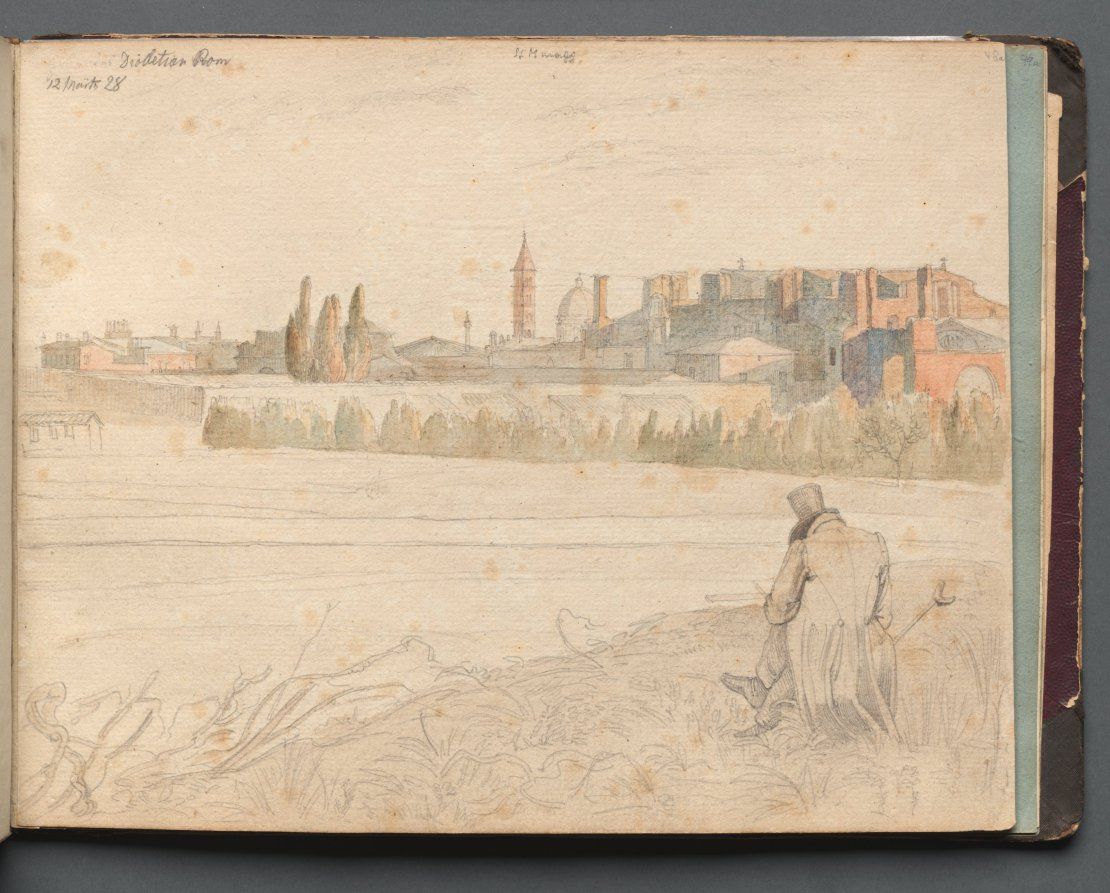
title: Album with Views of Rome and Surroundings, Landscape Studies, page 48a: Roman Panoramic View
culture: Germany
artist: Franz Johann Heinrich Nadorp (German, 1794–1876)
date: c. 1830s-70s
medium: watercolor with graphite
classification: Bound Volume